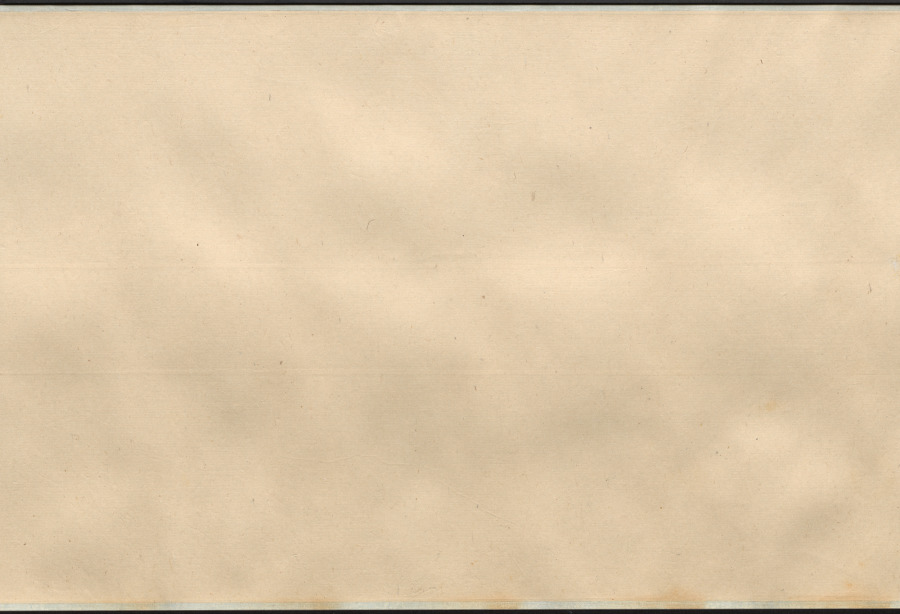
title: Rocks, Orchid, and Bamboo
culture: China, Qing dynasty (1644-1911)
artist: Shitao (Chinese, 1642–1707)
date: 1662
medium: handscroll; ink on paper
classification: Painting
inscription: Title colophon in four characters with signature and two seals on gold-flecked paper.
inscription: Artist's signature, inscription (with date of 1662), five seals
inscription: Colophon with two seals.